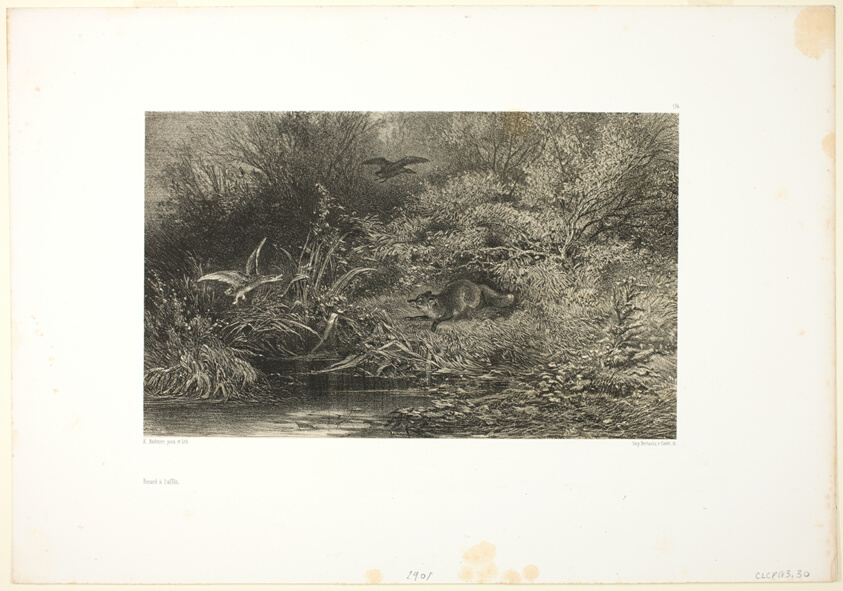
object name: Print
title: Fox on the Prowl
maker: Karl Bodmer (Swiss, 1809-1893)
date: 1840/49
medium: Lithograph on paper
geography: Switzerland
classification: lithograph; print; prints and drawing